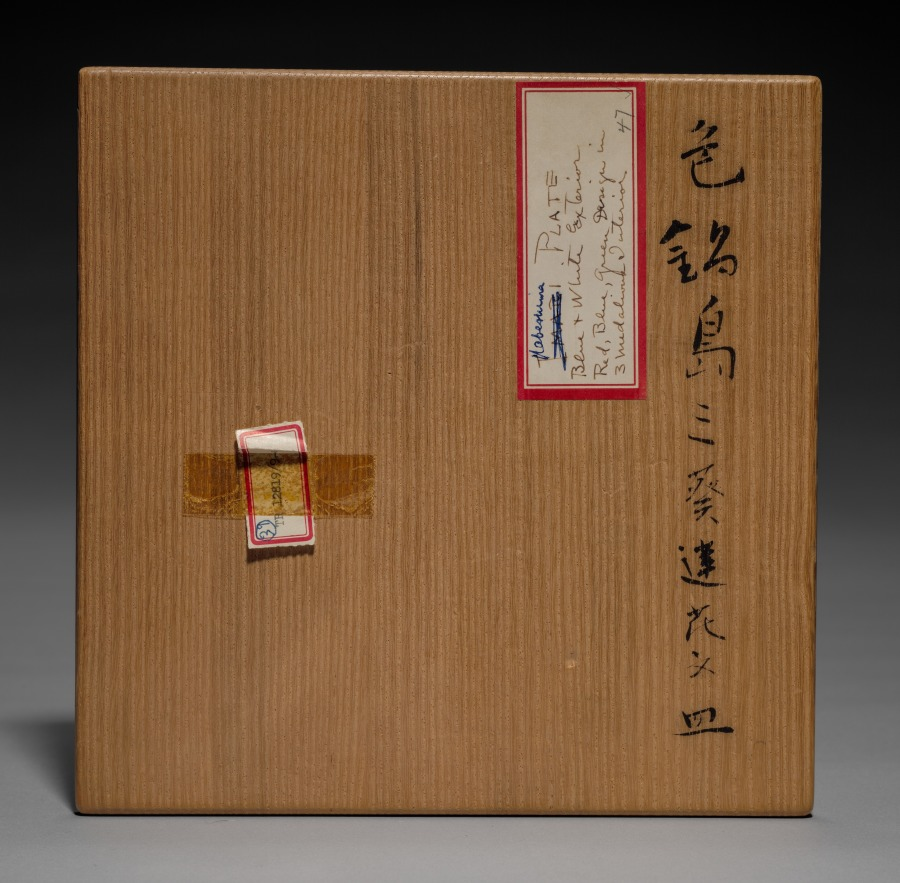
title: Dish with Lotus in Rui-Head-Shaped Cartouches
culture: Japan, Edo period (1615–1868)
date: mid-1800s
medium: Porcelain with underglaze blue and overglaze enamel (Hizen ware, Nabeshima type)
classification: Ceramic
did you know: A ruyi is a curved decorative object with a head like a cloud or lingzhi mushroom.